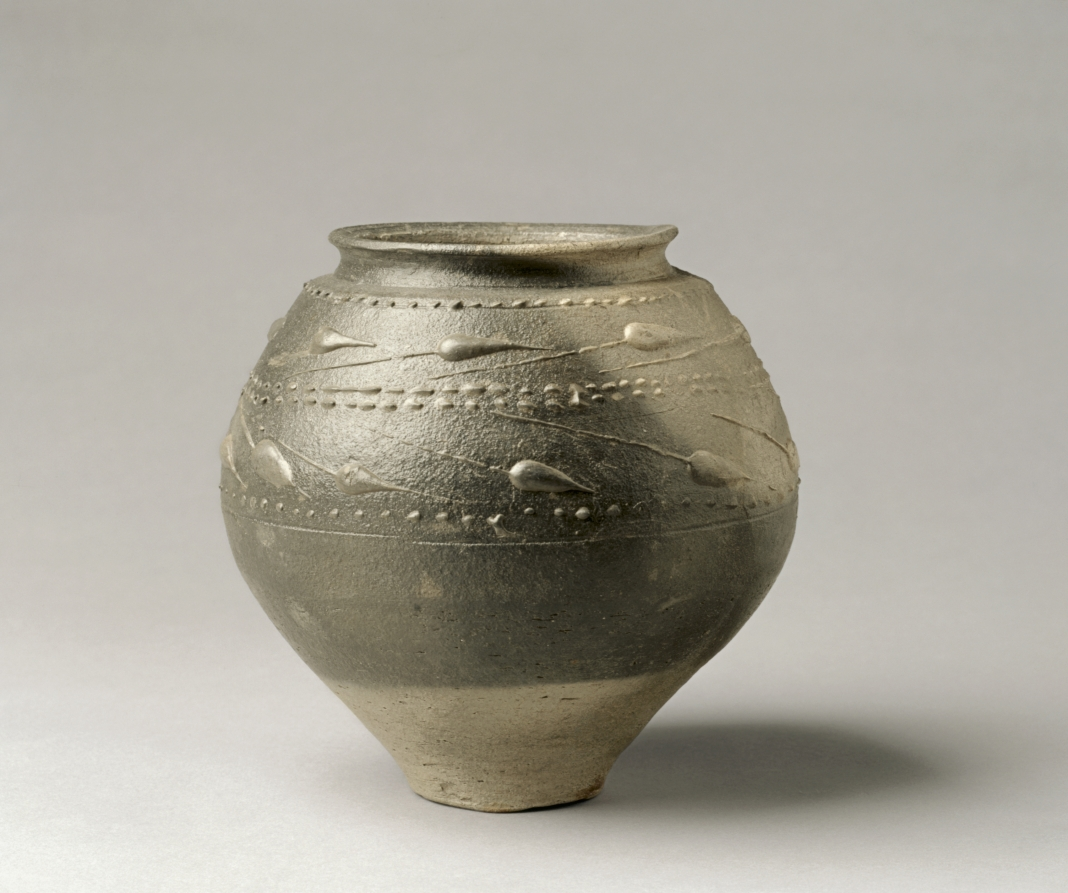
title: Globular Pot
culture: Rhenish (Cologne), Gallo-Roman, 2nd quarter 1st Century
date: 25–50 CE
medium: gray ware with black burnished slip and Barbotine decoration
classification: Ceramic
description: This pot is decorated with a pattern of leaves arranged in two rows, separated by parallel lines of dots. The vessel was thrown on a potter’s wheel and covered in a dark slip, leaving about two inches above the foot bare. After the Romans occupied Gaul (modern day France and Belgium) in the 1st century BCE, pots like this one with dark brown or black slips became increasingly popular in the northern provinces of the Roman Empire.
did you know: This pot’s decoration was applied using the barbotine method, in which a reed or horn is used to pipe clay slip onto the surface.